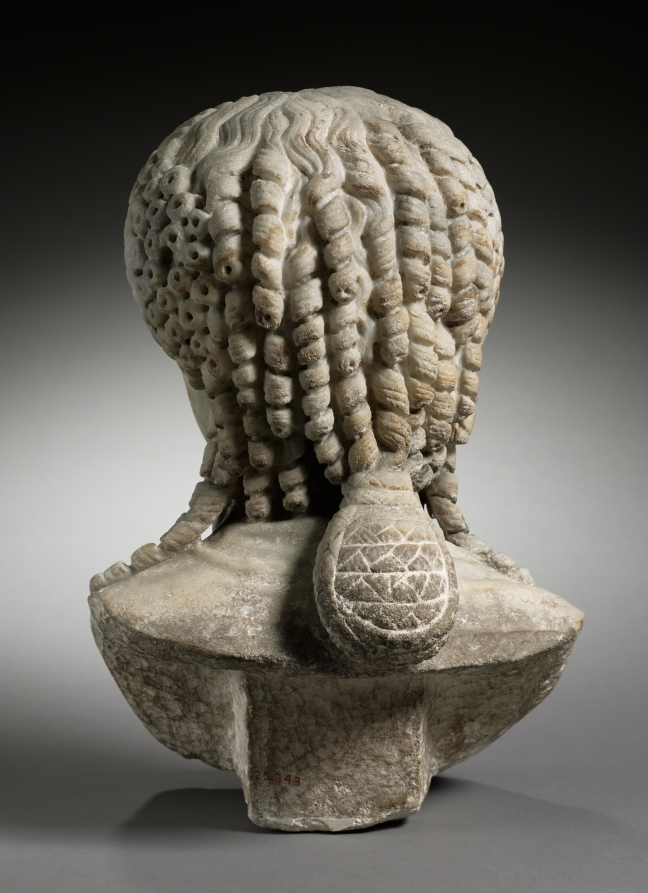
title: Portrait Bust of the Empress Claudia Octavia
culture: Italy, Roman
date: 50–70 CE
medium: marble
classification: Sculpture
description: This portrait bust depicts a young woman whose idealized features and elaborate hairstyle may identify her as the empress Claudia Octavia (r. AD 54-62), unfortunate first wife of the notorious emperor Nero. Over her tunic she wears a stola, a long garment hanging from both shoulders and distinguishing her as a married, upper-class woman. Although beloved by the Roman citizenry and described by the historian Tacitus as “aristocratic and virtuous,” Octavia was eventually divorced and banished by Nero, then ordered put to death.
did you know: The complex coiffure includes four elements: parted waves (top), tight curls (sides), hanging ringlets (shoulders, back), and a braided knot (back).